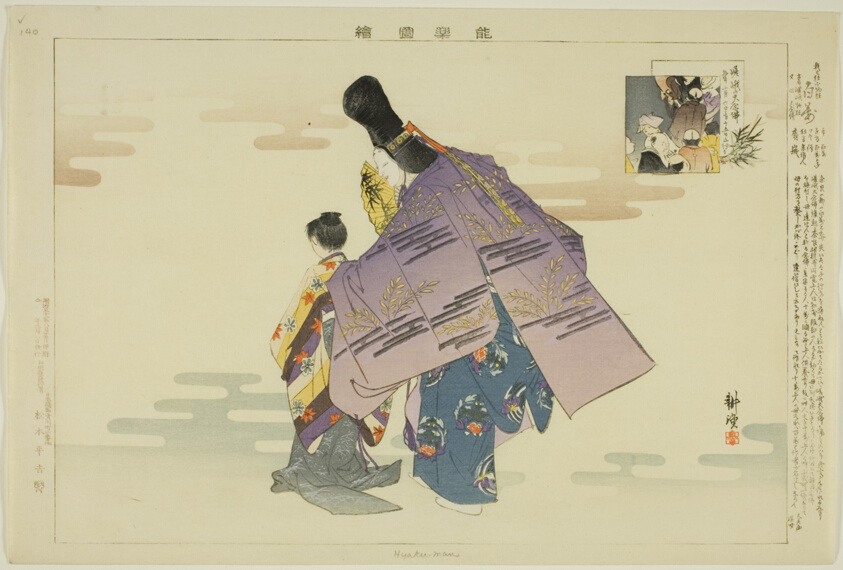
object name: Print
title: Hyakuman, from the series "Pictures of No Performances (Nogaku Zue)"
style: Japanese (culture or style)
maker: Tsukioka Kogyo; Japanese, 1869-1927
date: 1898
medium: Color woodblock print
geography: Japan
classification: woodblock print; print; asian art